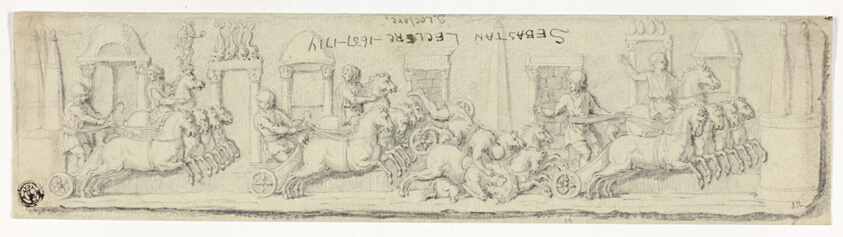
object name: Drawing and Watercolor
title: Antique Relief of Chariot Race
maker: Attributed to Sébastien Le Clerc, the elder; French, 1637-1714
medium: Black chalk on ivory laid paper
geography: France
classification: chalk; drawings (visual works); prints and drawing